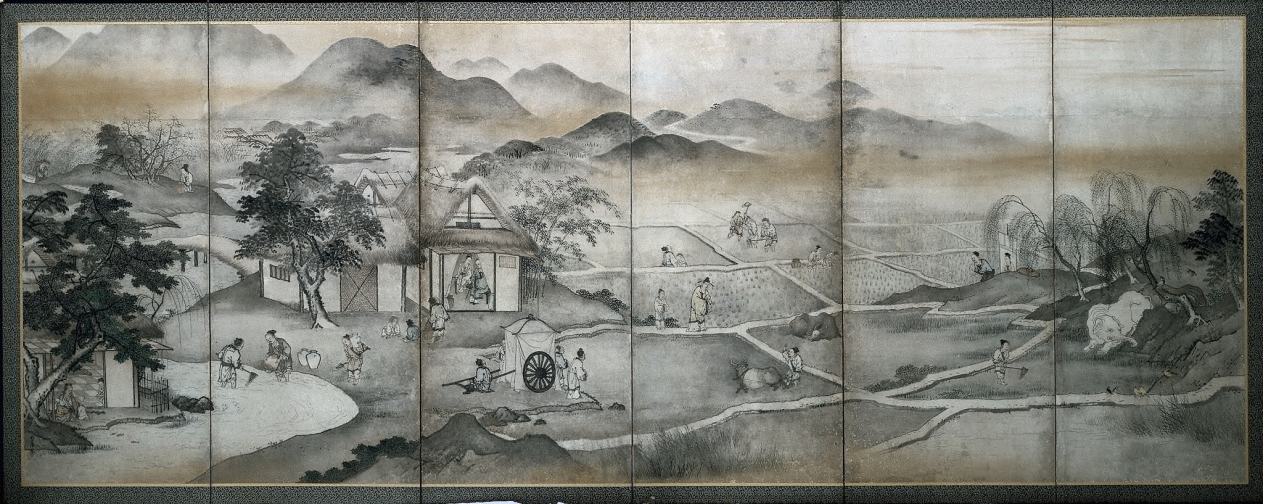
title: Emperor Yao Visiting Yu Chonghua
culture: Japan, Edo period (1615–1868)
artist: Kusumi Morikage (Japanese, active c. 1620–1690)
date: mid- to late 1600s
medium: One of a pair of six-panel folding screens, ink, slight color, and gold on paper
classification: Painting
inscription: signature and seal at lower right.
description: One of a pair, this screen shows a section of the narrative of how the Chinese Emperor Yao (about 2356–2255 BC) selected his successor, Yu Chonghua (about 2294– 2184 BC), who would become Emperor Shun. The artist who painted this screen, Kusumi Morikage, trained with Kano Tan’yō (1602–1647), painter-in-residence to Japan’s shogun, the country’s ruler, and was one of his four top students. Despite the conservative subject matter, Morikage’s distinctive sensibility shines through in his playful treatment of the gray and white elephants in the far left panel of the composition. According to legend, Chonghua was so virtuous that in the spring, elephants bounded down from the mountains to help him till the soil with their tusks.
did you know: The emperor's two-wheeled carriage sits in front of a thatched-roof farmhouse.